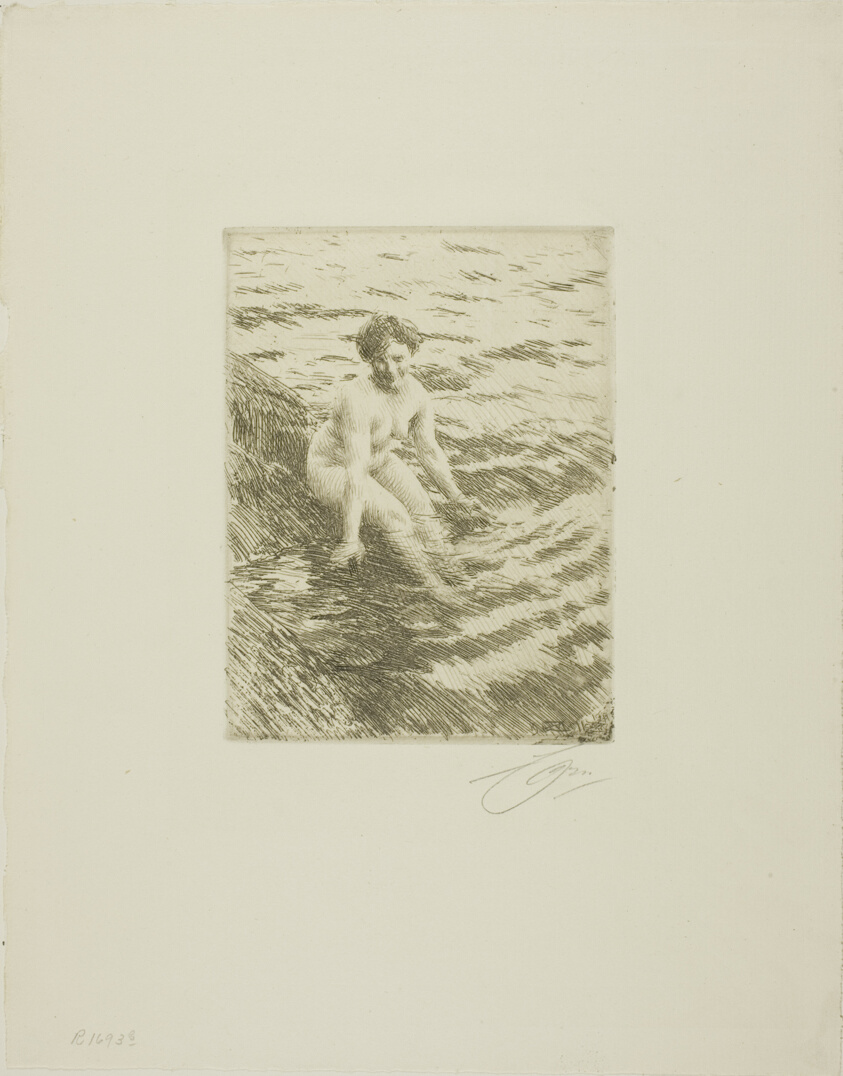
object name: Print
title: Wet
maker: Anders Zorn (Swedish, 1860-1920)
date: 1911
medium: Etching on ivory laid paper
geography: Sweden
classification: etching; print; prints and drawing